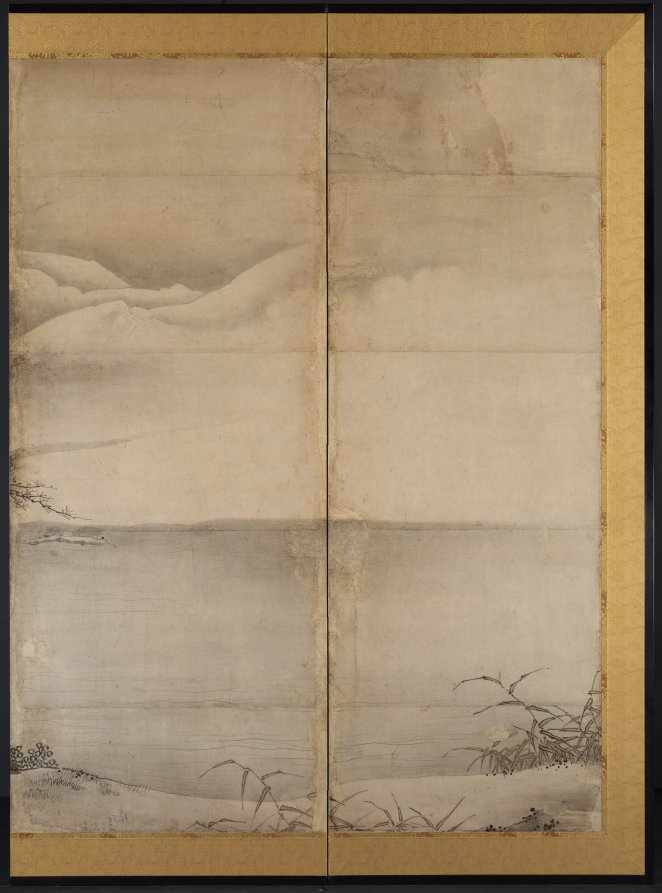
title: The Four Accomplishments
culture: Japan, Momoyama period (1573–1615)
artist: attributed to Kano Shōei (Japanese, 1519–1592)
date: late 1500s–early 1600s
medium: One of a pair of six-panel folding screens; ink and slight color on paper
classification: Painting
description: This is one of a pair of screens showing a group of elite Chinese gentlemen and their servants in the countryside. One man is considering his painting-in-progress. Historically, practicing or admiring painting was considered a skill essential for cultured men in China.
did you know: Although the painter captures his companion's attention, his young servant is having a nap.